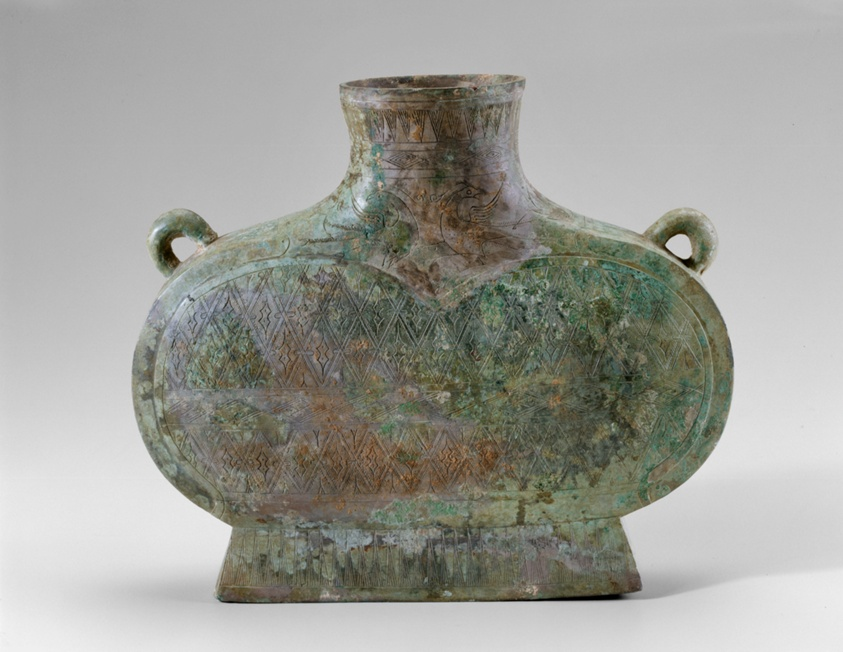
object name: Vessel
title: Wine Flask (Bian Hu)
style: Chinese (culture or style)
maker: China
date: Han dynasty (206 B.C.–A.D. 220), 1st century B.C./A.D.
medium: Bronze with incised decoration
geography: China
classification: bronze; metal; vessel; asian art